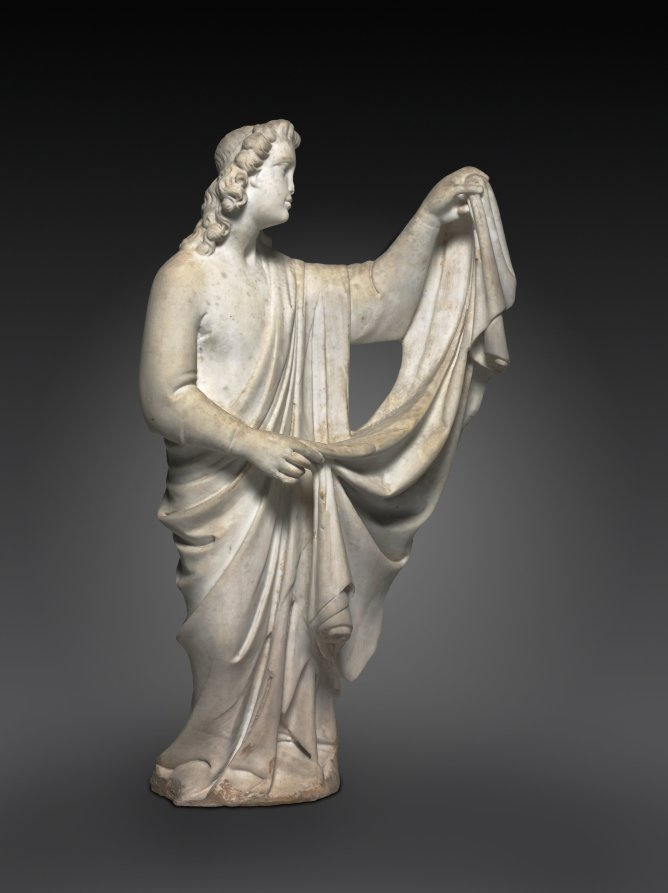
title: Angel from a Tomb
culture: Italy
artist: workshop of Tino di Camaino (Italian, c. 1285–1337)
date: 1330–50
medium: marble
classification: Sculpture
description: Tino da Camaino was active in Siena, Pisa, and Florence after 1311 where he established his reputation as an important and gifted sculptor. In 1323 he was summoned to the Angevin court at Naples, probably by King Robert of Anjou to work on the sepulchral monument of the king's daughter-in-law, Catherine of Austria. During the remainder of his life, Tino created a remarkable series of tomb sculptures in Naples. This pair of marble angels most likely represents the work of a member of Tino's workshop produced for one of these Neapolitan tombs, either during the final years of the master's life, or else independently after Tino's death in 1337.